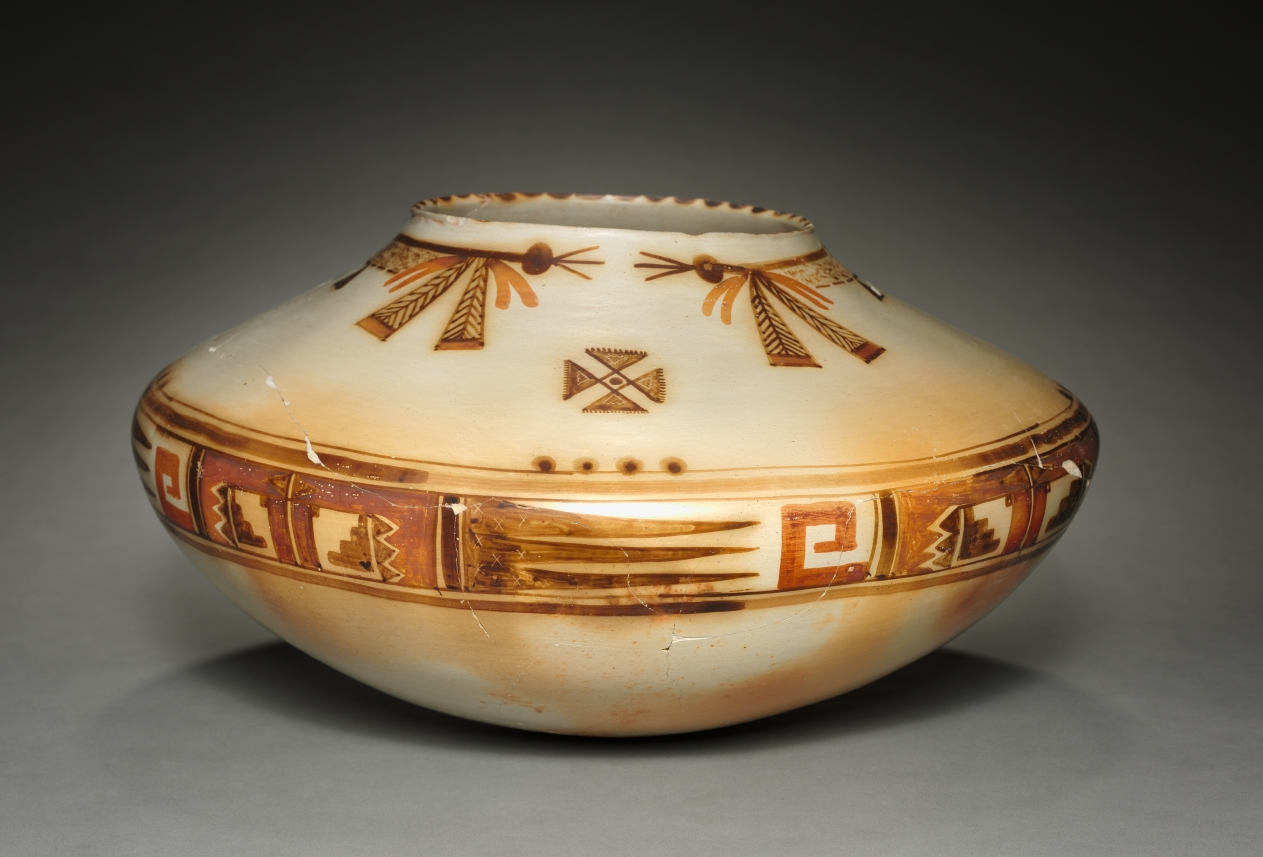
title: Jar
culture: Native North America, Southwest, Ancestral Pueblo, Sikyatki style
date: 1400–1600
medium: Ceramic, slip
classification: Ceramic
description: Ancient Sikyatki ceramics are noted for their large, distinctive shapes, meticulously stone-polished surfaces, thin walls that “ring” when tapped, and wide variety of reds and oranges, a contrast to earlier preferences for black and white. These artistically and technically inventive vessels are ancestral to modern Hopi ceramics, having developed in the area where Hopi communities live today. The Hopi regard a mottled orange color as a sign that the pot emerged from firing with life and spirit; the vessel’s “voice” is a bell-like tone that tapping produces. Such concepts likely have roots in the ancient past.